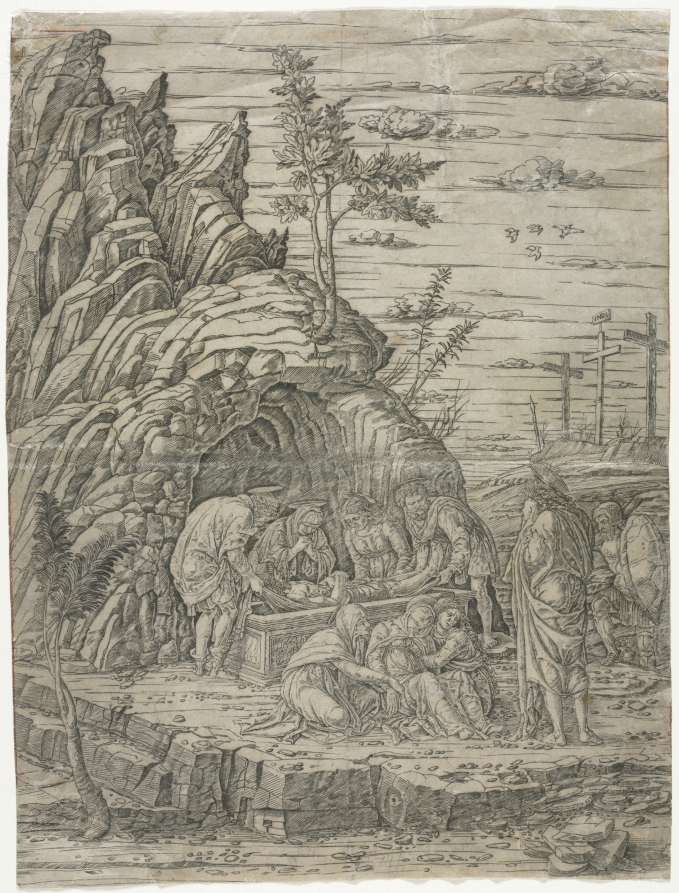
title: The Entombment with the Four Birds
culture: Italy, 15th century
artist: school of Andrea Mantegna (Italian, about 1431–1506)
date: c. 1470–1500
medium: engraving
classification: Print